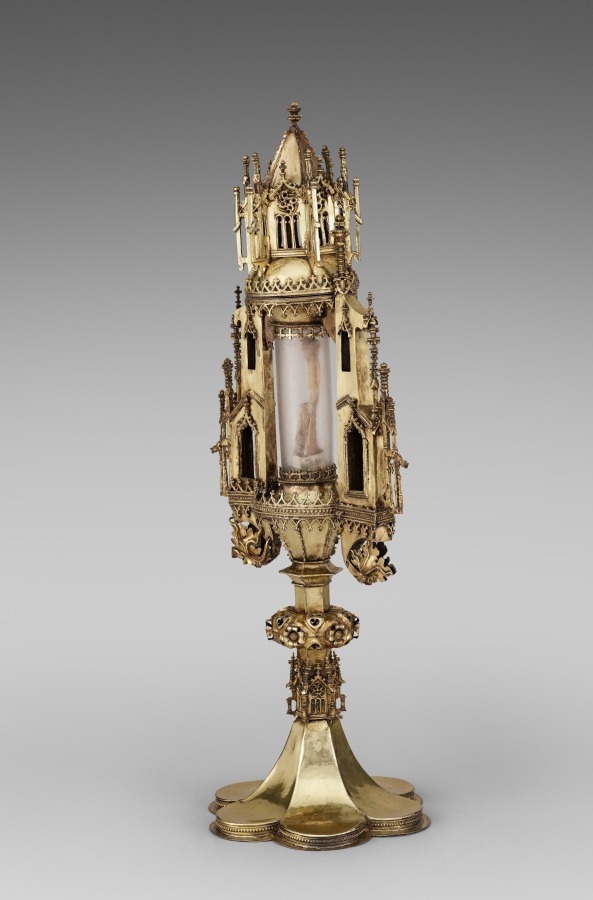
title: Monstrance with a Relic of Saint Sebastian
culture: Germany, Lower Saxony, Brunswick, Gothic period, 15th century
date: 1484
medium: gilded silver, rock crystal, bone, parchment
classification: Metalwork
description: This Late Gothic monstrance (from the Latin monstrare, "to show") is mentioned in the earliest inventory of Saint Blaise as "a large new monstrance containing relics of Saint Sebastian the martyr." Judging from surviving receipts, the reliquary was made by Werner Korff, a local goldsmith, who received payments for silver and gilding at the end of 1484. The reliquary was first displayed on the altar of the church of Saint Blaise in a solemn penitential mass on June 4, 1484, in an effort to ward off the plague. A recent examination revealed that the relic is a human metatarsal bone (one of five long bones of the human foot) and that its owner seemed to have suffered from periostitis, a medical condition that affects the connective tissue surrounding the bone.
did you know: In the Middle Ages, people suffering from diseases might make a journey, or pilgrimage, to venerate relics such as this one. The faithful believed that the remains of saints and holy people like Saint Sebastian could help those seeking aid such as relief from the plague.